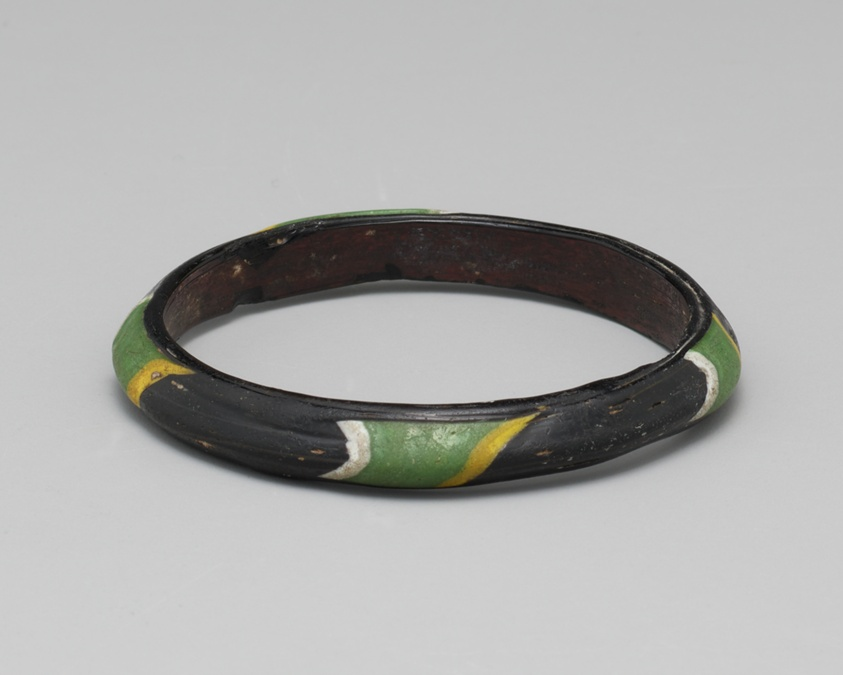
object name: Costume and Accessories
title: Bracelet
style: Islamic (culture or style)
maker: Islamic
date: 14th-15th century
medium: Glass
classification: glass; jewelry; ancient art; costume